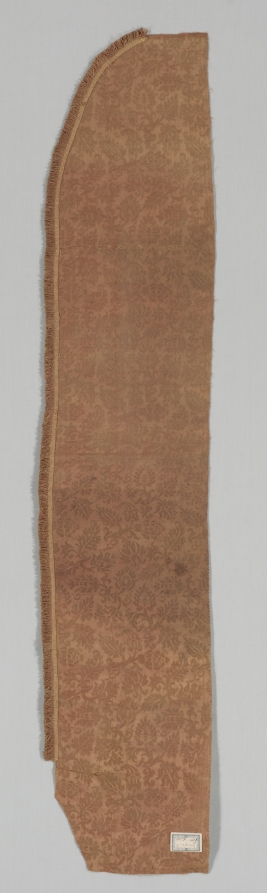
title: Textile Fragment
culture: Italy, 16th-17th century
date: 1500s - 1600s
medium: silk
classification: Textile